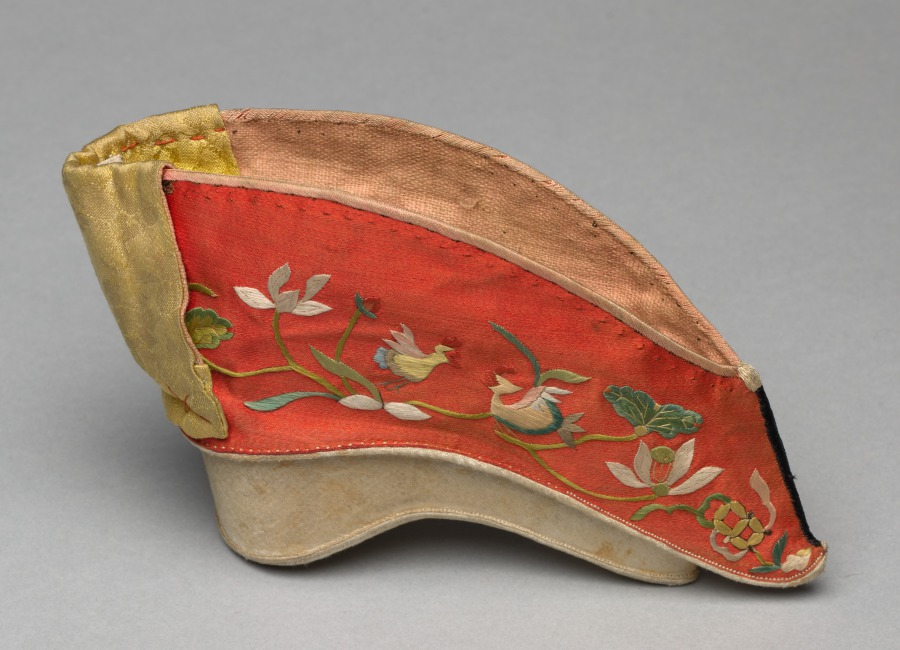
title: Shoe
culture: China, Qing dynasty (1644-1911)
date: 1800s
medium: embroidery, silk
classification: Garment